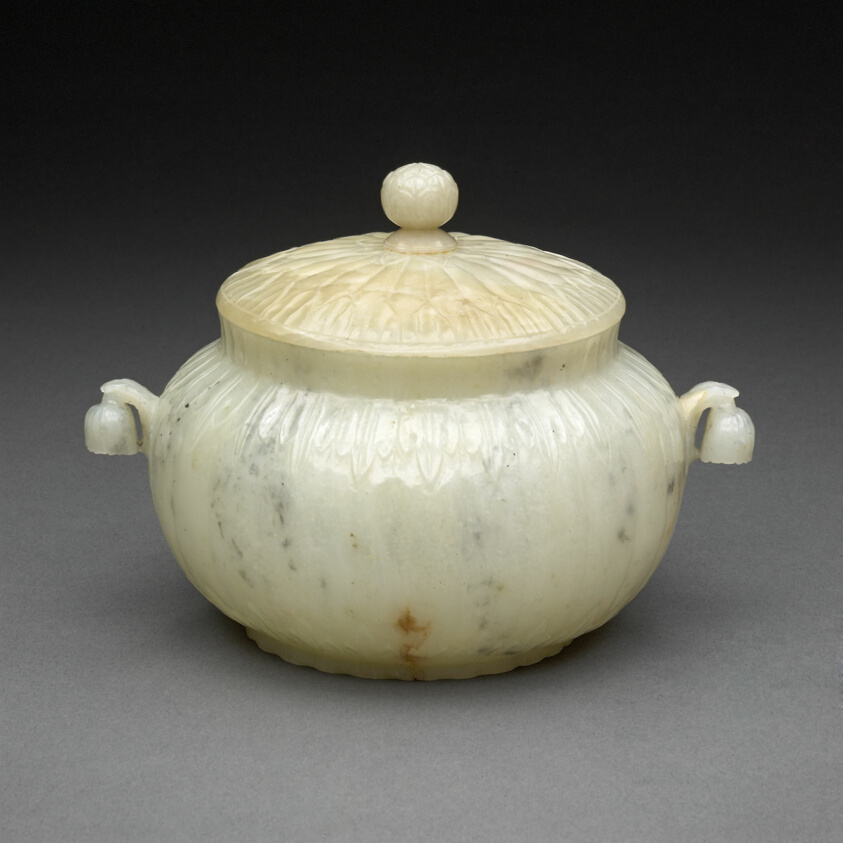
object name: Decorative Arts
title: Covered Potiche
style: South Asian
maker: India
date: 18th century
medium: Jade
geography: India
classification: jade; asian art; decorative arts